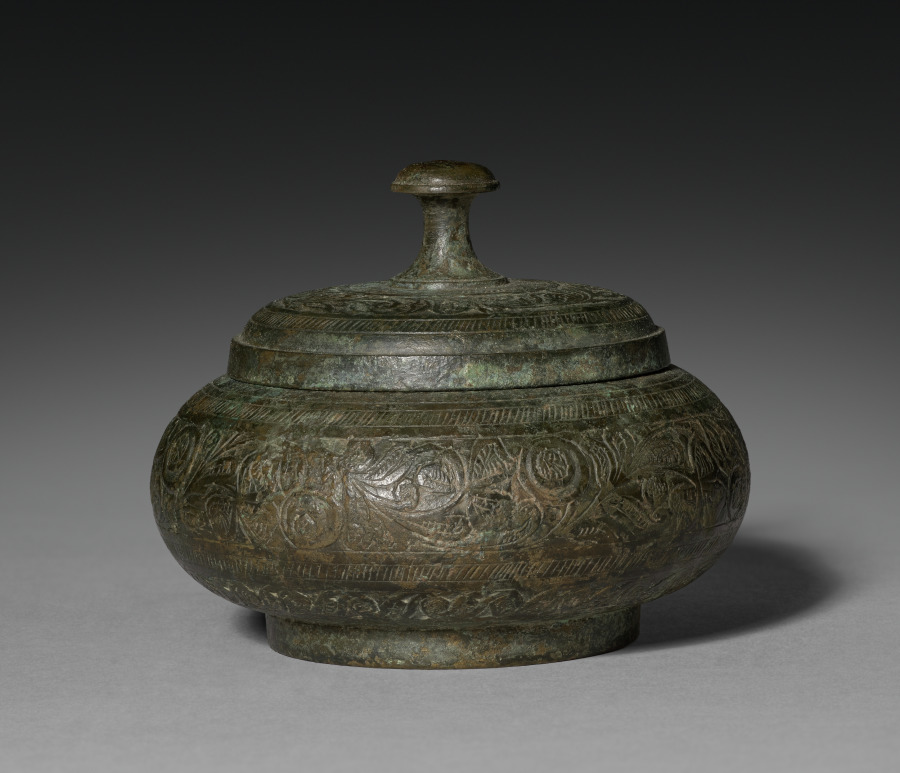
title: Reliquary Box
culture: Pakistan, Gandhara, probably Swat, late Kushan period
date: 200–400 CE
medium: bronze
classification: Metalwork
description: This casket in bronze represents the great variety of reliquary caskets. It is round, has a low foot, and is covered with a lid (with raised handle) that fits over the vessel rather than being inset. It is a traditional shape frequently encountered in Gandharan reliquaries, but its slight flattening and elaborate decoration imply a slightly late date. A central band of a floral creeper decorates the main body of the box and its lid, and is framed on both sides by narrower fluted bands. This type of freehand design is characteristic of the late Kusana-early Gupta period. Similar floral patterns are found in another CMA object (1972.164), the lid of a box showing combat between a man and a lion, which also dates to a later period. There the design fills the vacant areas in the busy composition. This pattern, however, has its antecedents in the Begram ivories . which, according to most sources, pre-date the Sasanian invasion of the mid-third century AD. Therefore, it can be assumed that this type of floral decoration was already in use in the third century and that this reliquary box probably dates to the third-fourth century AD. The bronze alloy, in its somewhat silverish-metallic appearance, seems to be very close to the material used in the Swat bronzes, which suggests that Swat may also be the provenance for this reliquary.